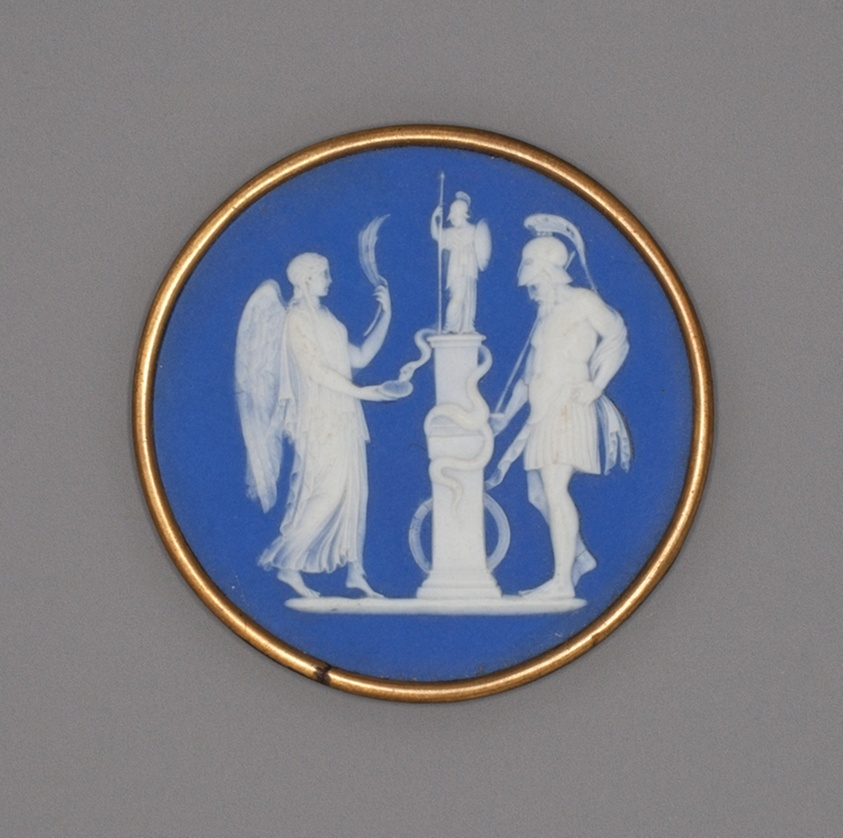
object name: Ceramics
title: Medallion with Warrior and Priestess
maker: Wedgwood Manufactory (England, founded 1759)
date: Late 18th century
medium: Stoneware (jasperware)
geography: Burslem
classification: sculpture; stoneware; european decorative arts; ceramics